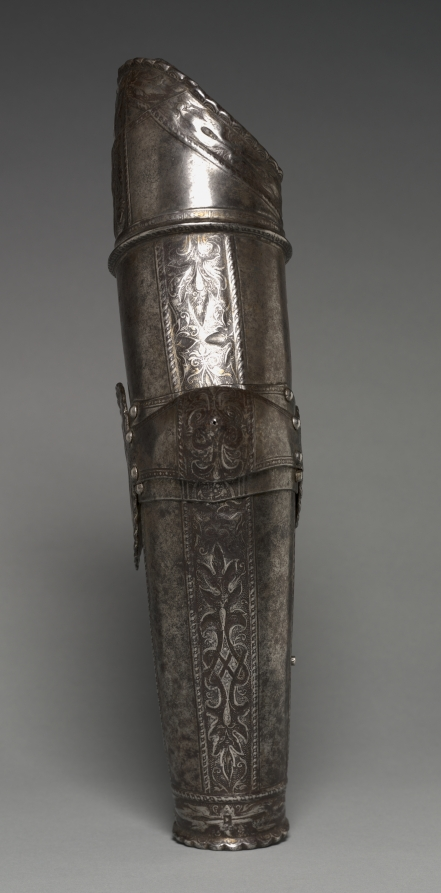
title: Left Arm Elements from a Boy's Armor (Lower Cannon, Couter, Rerebrace)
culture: Germany, Augsburg, mostly 17th Century (some modern)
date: c. 1560 (some modern)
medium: etched and lightly embossed steel with traces of gilding, leather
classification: Arms and Armor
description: These elements once belonged to a full suit of armor that would have been made for a young boy. Decorated with etching, embossing, and gilding, the original suit would have been impressive. Dressing your sons in small custom suits of armor was popular with the wealthiest nobles. They would have been worn for parades and ceremonial occasions and once outgrown were often kept as mementos. Made for the left arm, the rerebrace or upper cannon protected the upper arm, the couter the elbow, and the lower cannon the forearm.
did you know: Small-scale suits of armor would help prepare a young boy for knighthood.